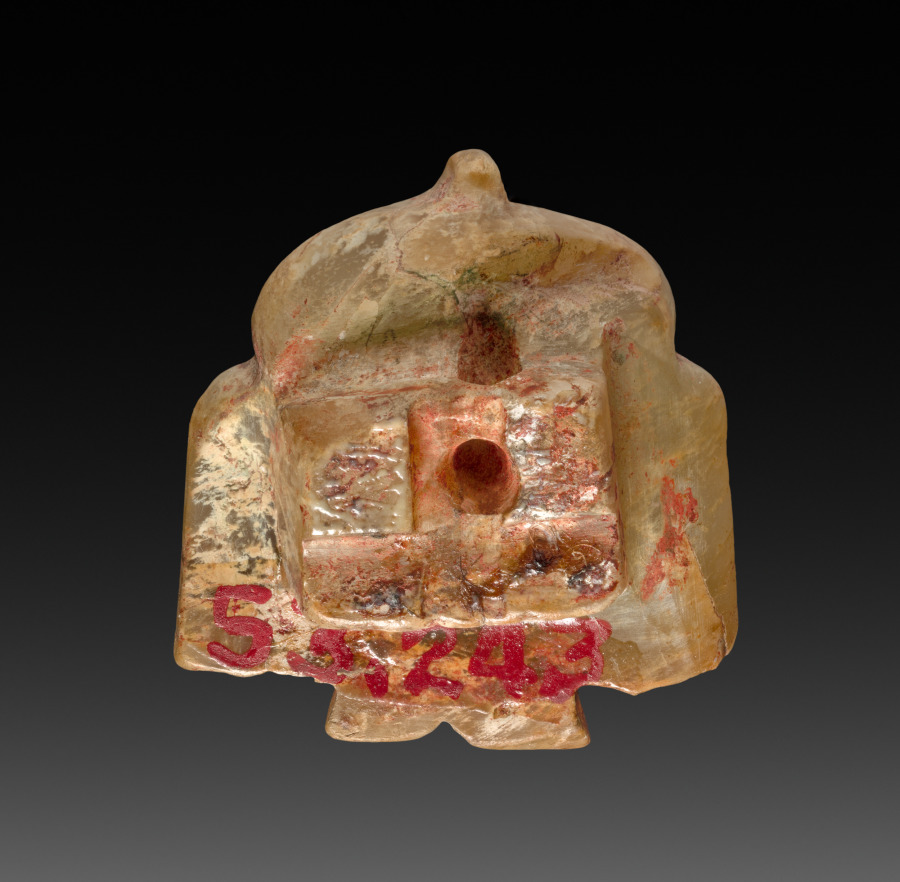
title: Bird in Flight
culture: China, Shang dynasty (c. 1600–c. 1046 BCE)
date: 1300–1100 BCE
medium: jade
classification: Jade